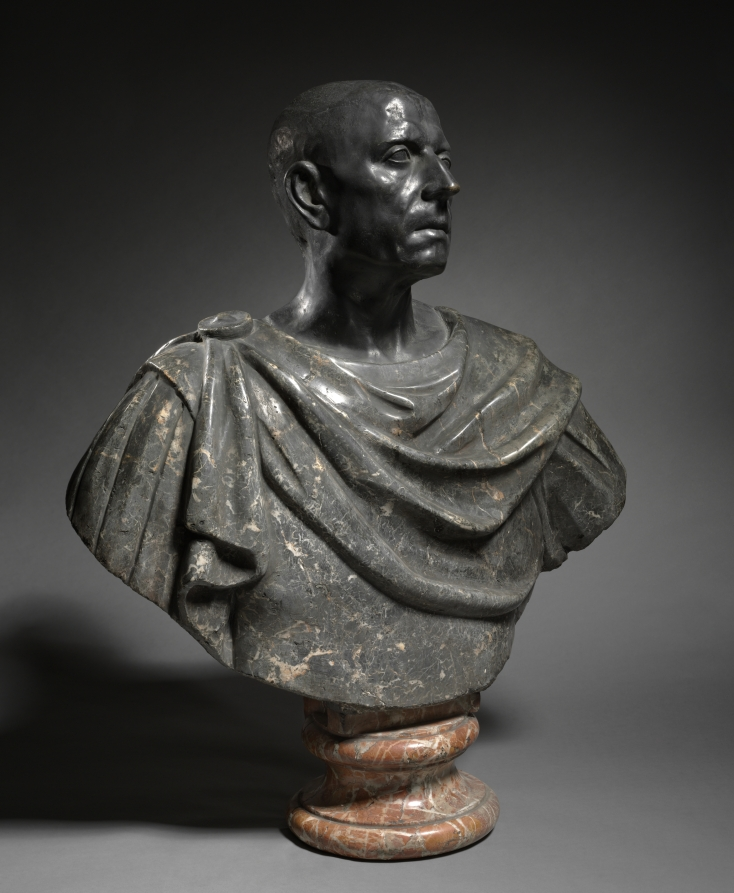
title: Bust of the Ludovisi Cicero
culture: Italy, 17th century or later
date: 1600s or later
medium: marble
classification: Sculpture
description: This work is a variant on the so-called Ludovisi Cicero, a bust in the Uffizi, Florence, that was long-believed to represent the famous Roman orator, but in fact appears to represent an unknown intellectual from the late Roman Republic or early Empire. This interpretation may date as late as the 20th century, and may have been assembled from separate parts.